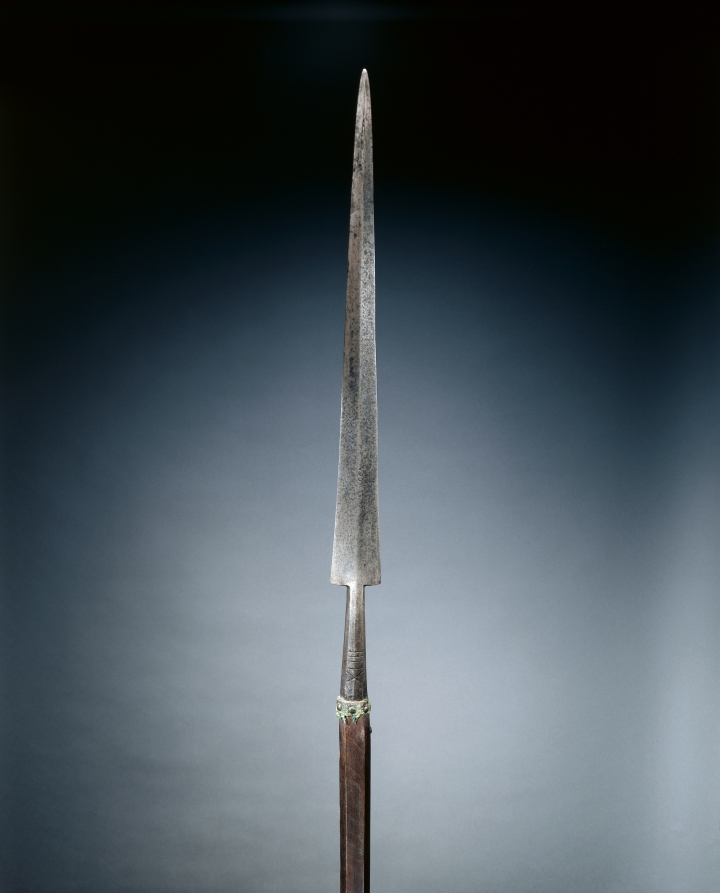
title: Partisan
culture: Italy, early 17th Century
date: c. 1600–1620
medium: steel; rectangular wood haft with planed corners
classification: Arms and Armor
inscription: on blade: Lucca; on socket: XIII